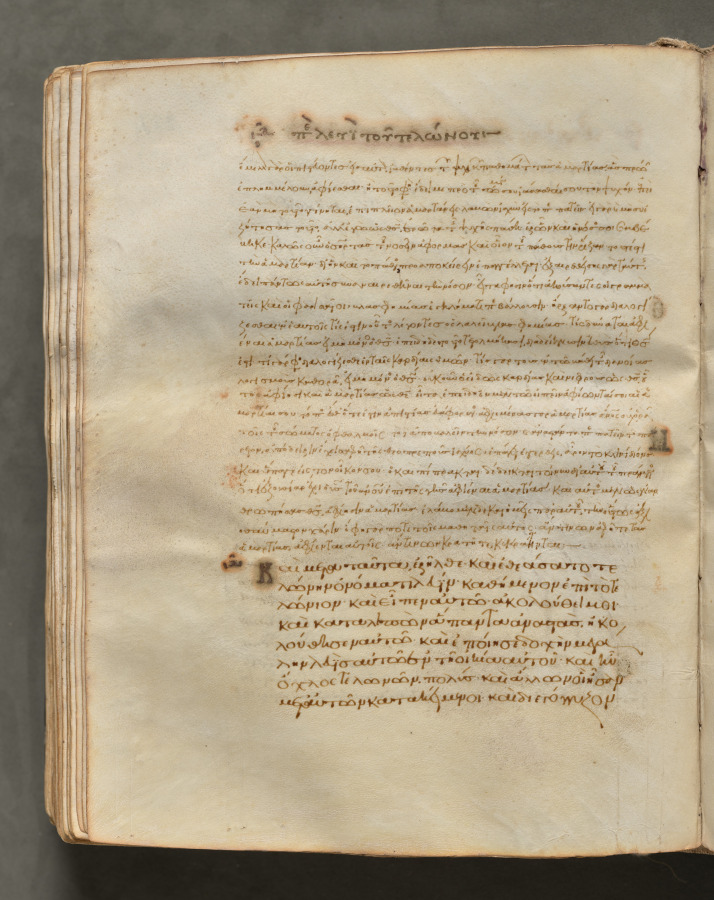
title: Text, folio 224 (verso), from a Gospel Book with Commentaries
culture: Byzantium, Constantinople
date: c. 1000–1100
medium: ink, tempera, and gold on vellum; leather binding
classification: Bound Volume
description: Each of the four gospels in this book opens on a page with brilliantly illuminated borders depicting the author of the text as well as birds-principally peacocks, symbols of the immortality of the soul-and fountains, representing the fountain of life and the salvation of the soul. This volume consists of 428 leaves with texts in Greek. Its level of sophistication suggests that it was probably written and decorated in a monastery in Constantinople.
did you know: Gospel Books were carried in procession through Byzantine churches.